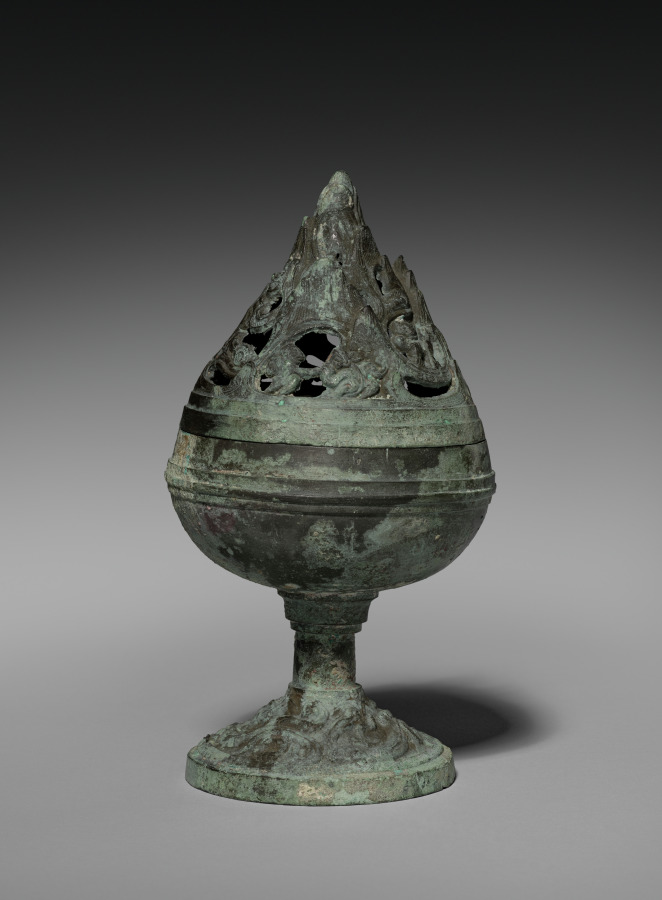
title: Incense Burner (Boshan Lu)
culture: China, Western Han dynasty (206 BCE–8 CE)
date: 200–100 BCE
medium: bronze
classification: Metalwork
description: The conical cover of this incense burner represents a miniature mountain with hunting scenes. The cover was shrouded in mist and emanated intoxicating smoke through its openwork when fragrant woods and herbs were burnt in its stem cup, transporting its beholder into an imaginative realm.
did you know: Deities (appearing as hunters) and fantastic beasts roam freely among mists and clouds on this incense burner.